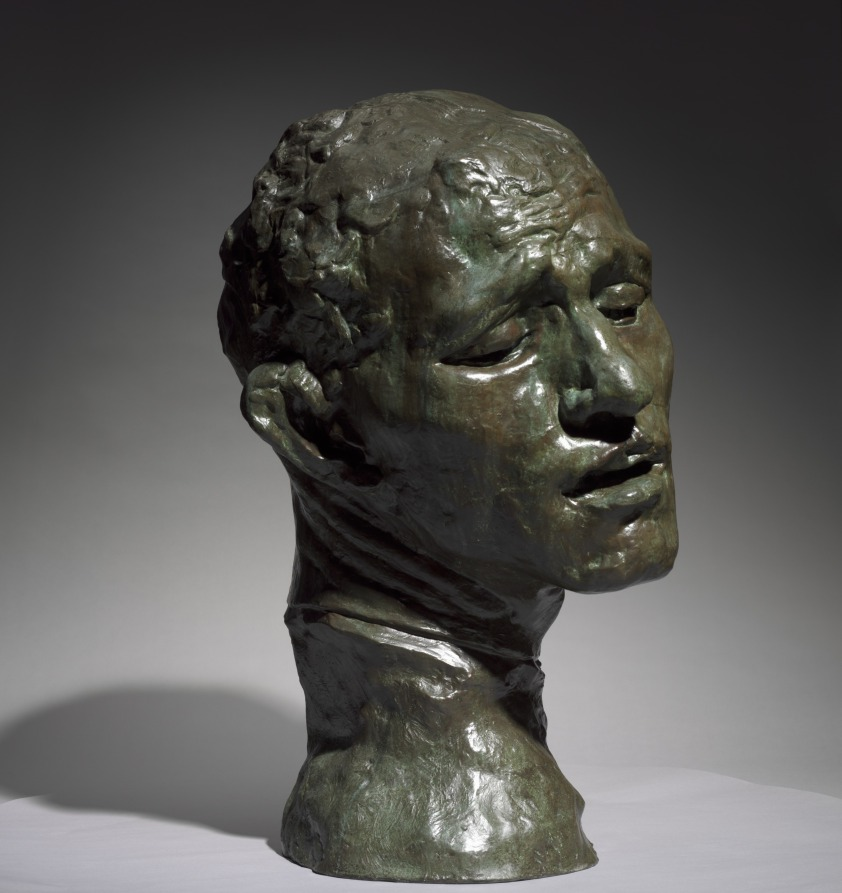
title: Heroic Head of Pierre de Wissant, One of the Burghers of Calais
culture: France, 19th century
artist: Auguste Rodin (French, 1840–1917)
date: 1886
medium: bronze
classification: Sculpture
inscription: inscribed at neck, left: A.Rodin; inscribed lower back: Alexis Rudier/Fondeur-Paris.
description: This sculpture depicts one of the figures in Rodin’s large public monument The Burghers of Calais (1884–89), featuring six French men who volunteered to be taken prisoner by the English in exchange for lifting the siege of Calais during the Hundred Years War (1337–1453). Pierre de Wissant’s anguished expression suggests extreme mental suffering as he contemplates his expected execution. Rodin exhibited a life-size version of the figure as an independent work before completing the monument. He later made multiple versions in various sizes and media.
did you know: This sculpture depicts the head of a figure from Rodin's large public monument The Burghers of Calais (1884-89). The CMA also owns a plaster version of the head.